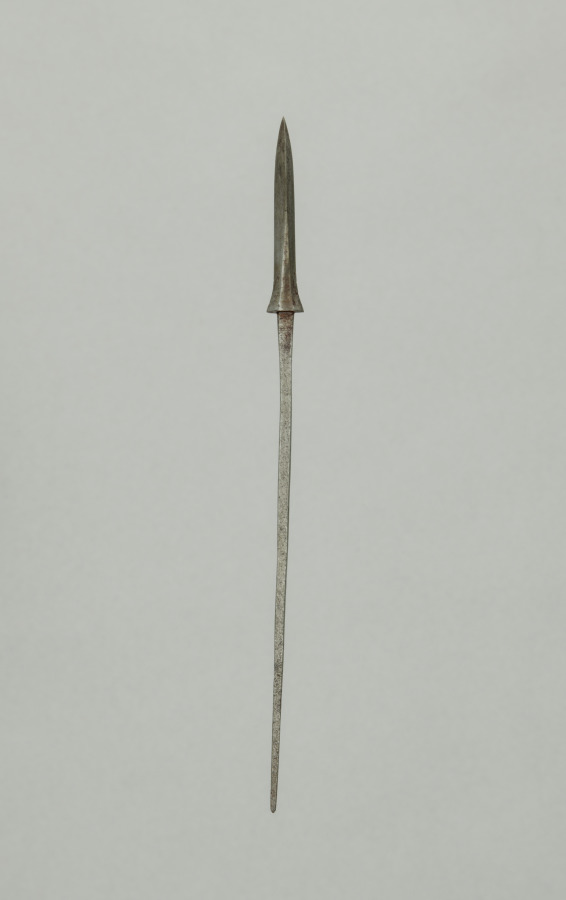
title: Arrow Point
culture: Japan, Edo period (1615–1868)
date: 1700s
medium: steel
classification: Arms and Armor